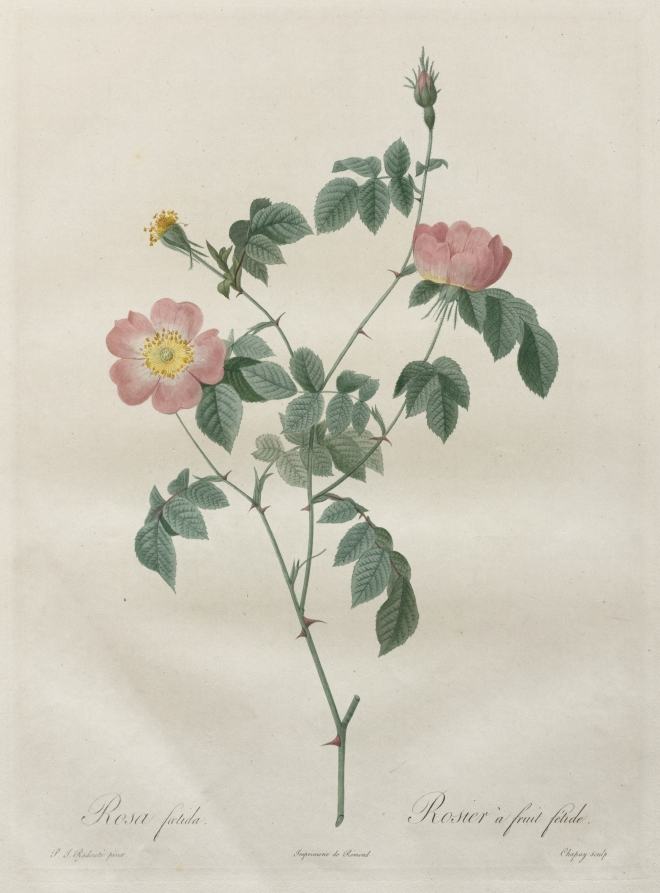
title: Les Roses: Rosa indica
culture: France, 19th century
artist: Henri Joseph Redouté (French, 1766–1853)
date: 1817–1824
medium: stipple and line engraving, with hand coloring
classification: Print